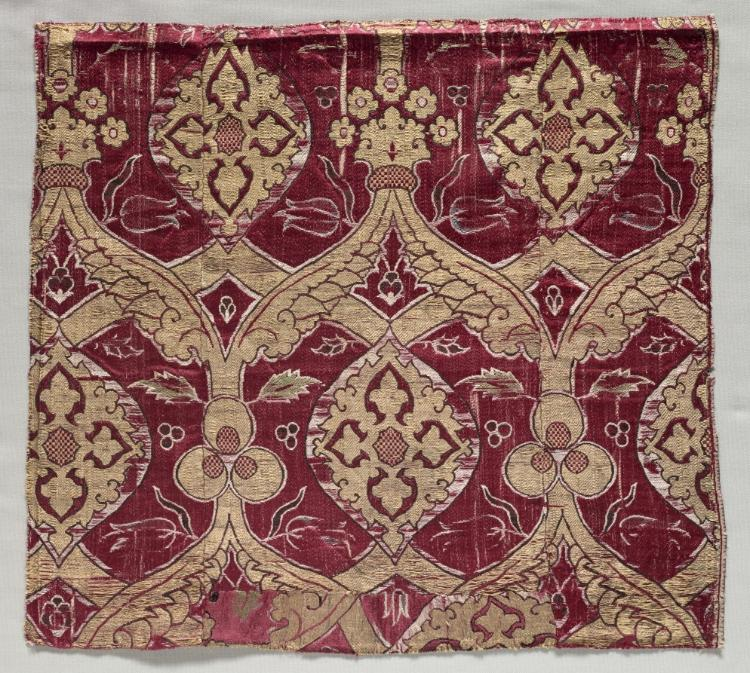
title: Textile Fragment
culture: Turkey, Bursa, late 16th century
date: late 16th century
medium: brocaded silk with metal thread weft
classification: Textile